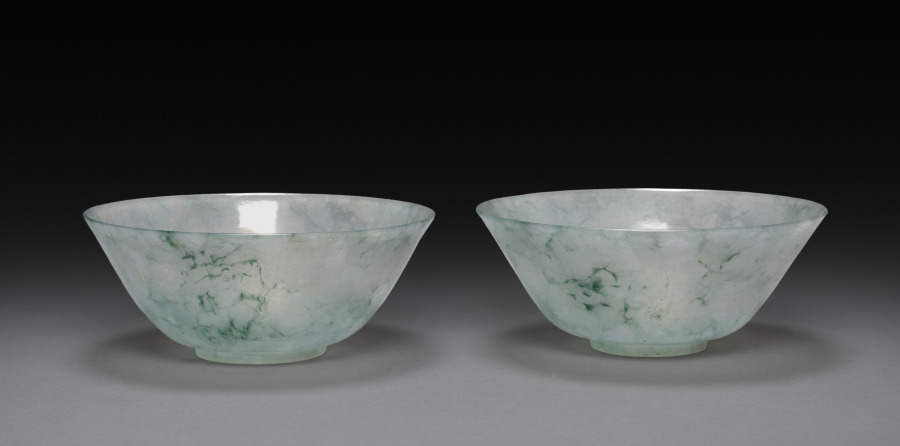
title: Pair of Bowls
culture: China, Qing dynasty (1644–1911), Qianlong mark and reign (1736–95)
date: 1736–95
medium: jade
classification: Jade